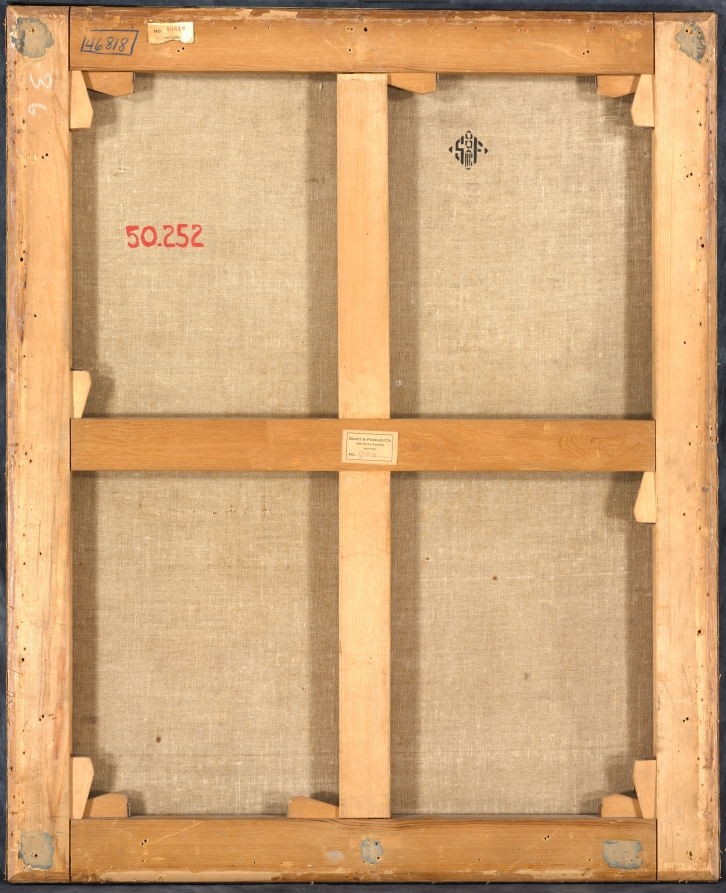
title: A Bearded Man Wearing a Hat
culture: Netherlands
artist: studio of Rembrandt van Rijn (Dutch, 1606–1669)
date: c. 1655–60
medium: oil on canvas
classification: Painting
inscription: Signed above shoulder at right: "Rembrandt 16[?]"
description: Amsterdam of the early 1600s was a religiously tolerant city, attracting many Jewish settlers of both Sephardic (Spanish and Portuguese) origin and Ashkenazic (Eastern European) descent. Rembrandt lived among both denominations and found inspiration in the manner and dress of the Ashkenazim, who maintained traditional comportment and attire and were less affluent than their Sephardim counterparts. As a result, many of the unidentified portraits from Rembrandt's late period once carried Jewish associations, but because of a lack of sufficient evidence, those assignations have since been reconsidered. Such is the case with Portrait of a Man, which was once considered a portrait of the Dutch Jewish philosopher Baruch Spinoza (1632–1677) as well as a representation of a Jewish student. Rembrandt's authorship of the painting has also undergone reassessment. The broad and thinly painted cloak and hat suggests the painting is likely a workshop product and while it does display Rembrandt's characteristic interest in a sitter's introspection, the figure's thoughtfulness remains comparatively superficial.